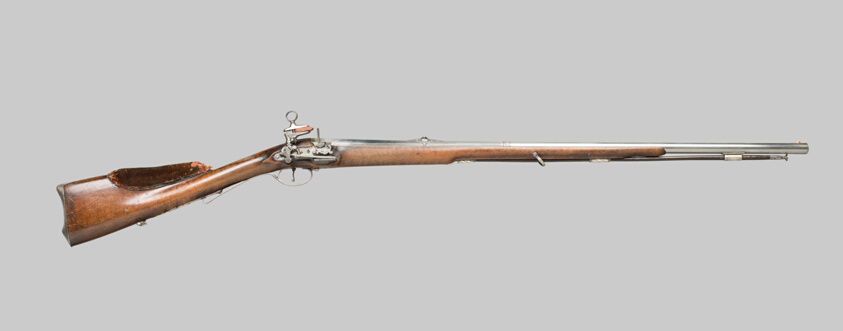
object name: Arms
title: Flintlock Fowling Gun with Miquelet Lock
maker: Augustin Hortiz; Spanish, Madrid, active 1740-died 1771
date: 1750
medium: Steel, iron, brass, gold, silver, walnut, velvet, and horn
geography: Madrid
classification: firearm-long gun; arms; arms and armor